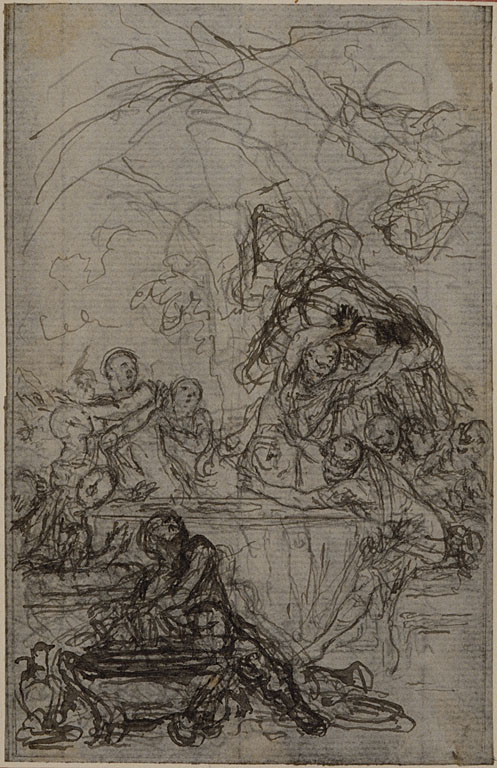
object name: Drawing and Watercolor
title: Study for an illustration in Tacitus "Tibère, ou Les Six Premiers Livres des Annales", Book IV, Vol. 2, 1st Study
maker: Hubert François Gravelot (French, 1699-1773)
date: c. 1768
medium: Pen and black ink, with graphite, on gray laid paper, incised for transfer and perimeter mounted on ivory laid paper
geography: France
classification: pen and ink drawings; drawings (visual works); prints and drawing